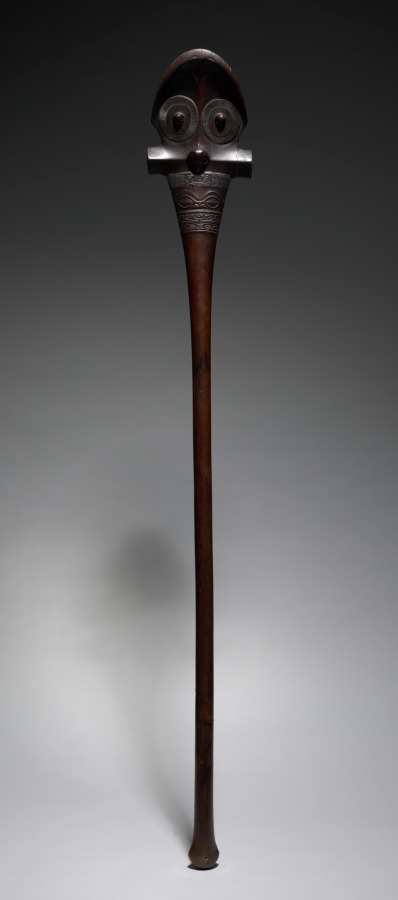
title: War Club ('U'u)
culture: Polynesia, Marquesas Islands, early 19th Century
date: early 1800s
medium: stained ironwood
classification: Sculpture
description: The head of this war club is carved as an abstract face, with small additional faces appearing at the eyes, nose, and forehead. Low-relief patterns encircle the club's neck. Fashioned from dense-grained ironwood (casuarina) or toa wood, the club is quite heavy. Like stilt footrests, war clubs were carved by expert artists (tahuna) and cured in the mud of a taro patch. The glossy finish is the result of regular rubbing and polishing with scented coconut oil. Similar war clubs were seen and recorded by the crew of Captain Cook's second voyage to the South Seas in 1772-75.